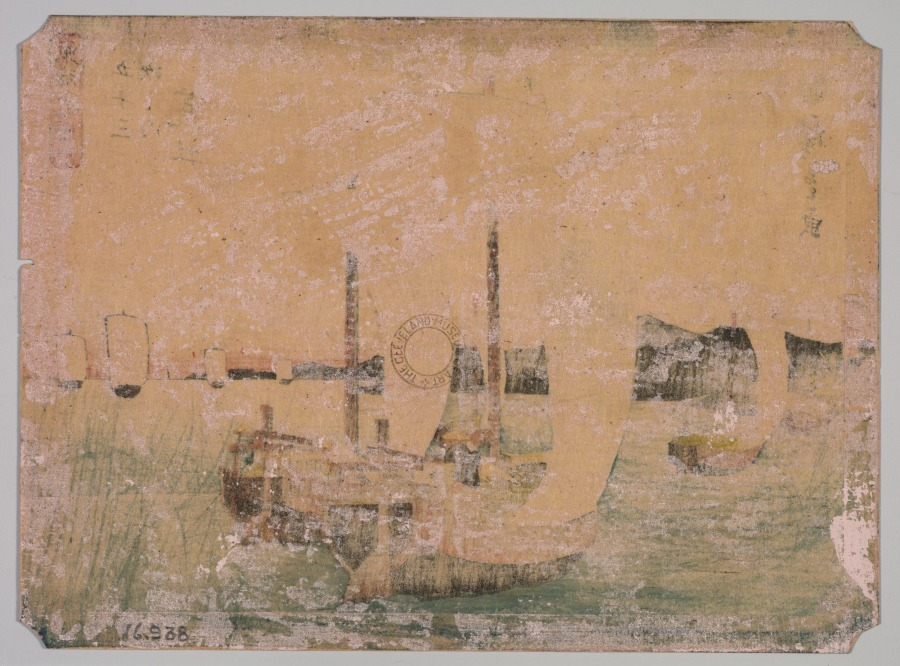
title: Sail Boats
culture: Japan, Edo period (1615–1868)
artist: Utagawa Hiroshige II (Japanese, 1826–1869)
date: 1839–1864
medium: color woodblock print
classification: Print